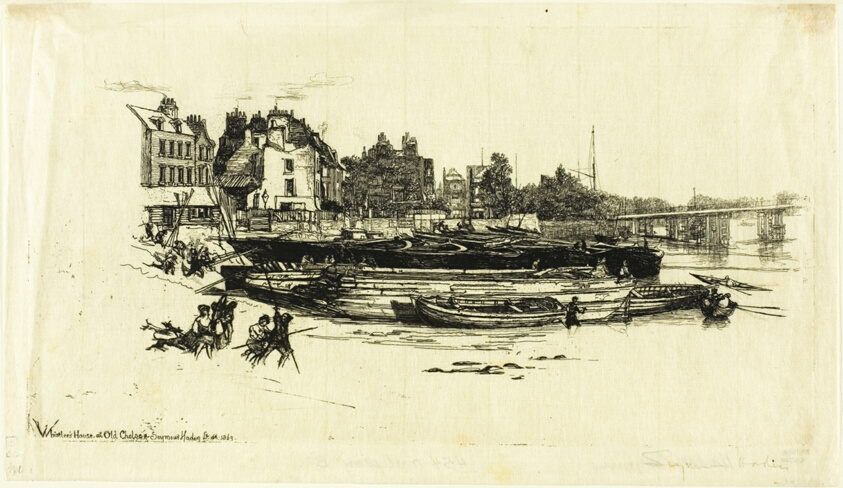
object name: Print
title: Whistler's House, Old Chelsea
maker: Francis Seymour Haden (English, 1818-1910)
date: 1863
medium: Etching with drypoint on ivory Japanese paper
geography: England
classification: etching; print; prints and drawing